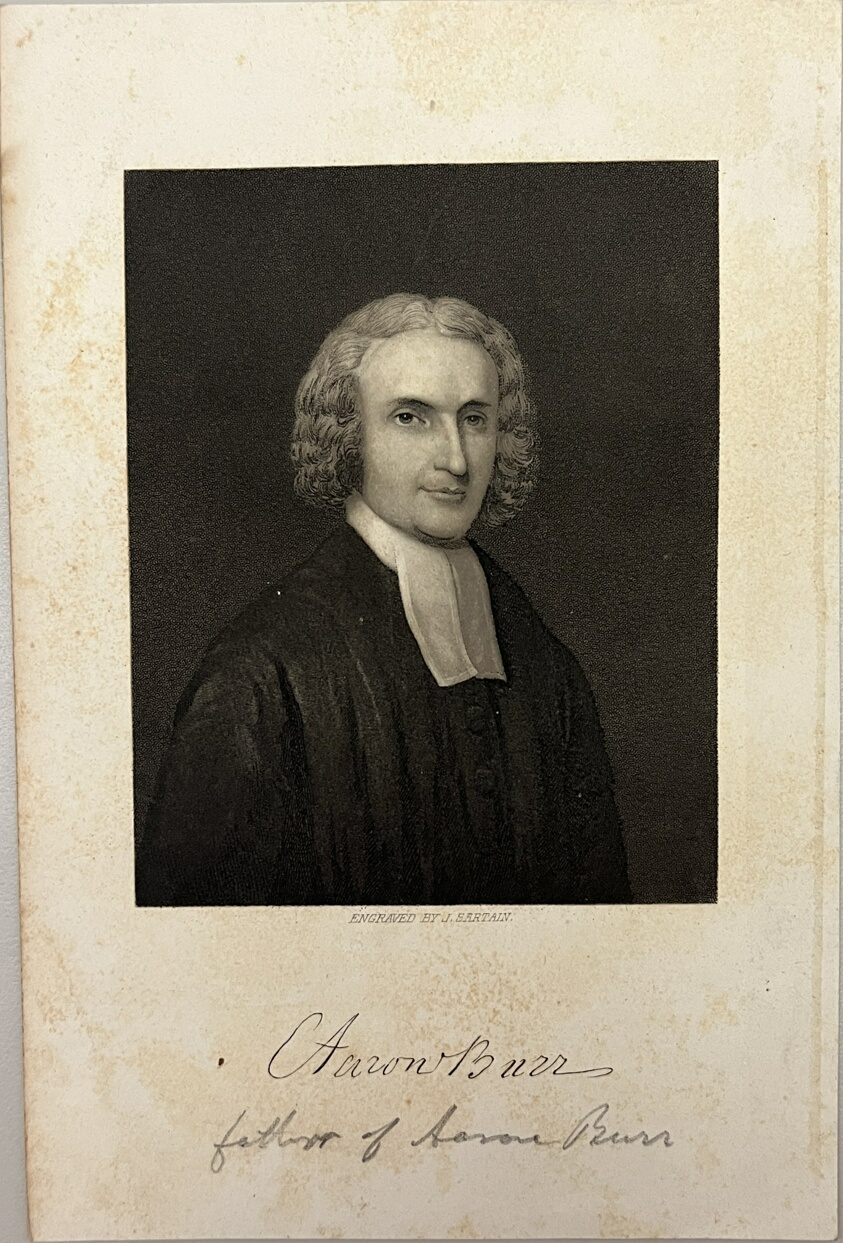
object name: Print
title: Aaron Burr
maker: John Sartain (American, 1808-1897)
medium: Etching and aquatint on paper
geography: United States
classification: reproduction; print; prints and drawing